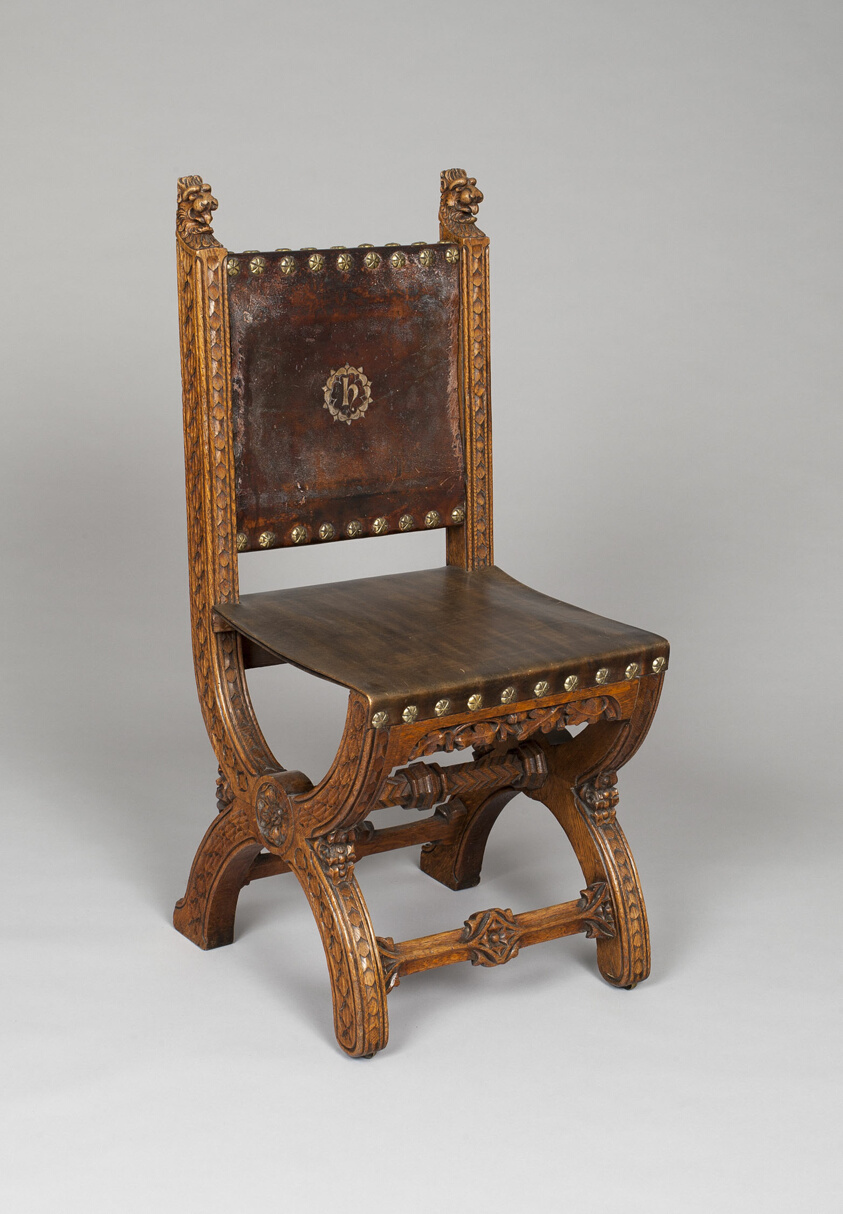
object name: Furniture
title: Side Chair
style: gothic revival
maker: Designed by Augustus Welby Northmore Pugin; English, 1812-1852; Possibly made by John Webb; London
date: c. 1848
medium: Oak, leather, and brass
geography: London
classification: chair; seating; furniture; european decorative arts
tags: furniture